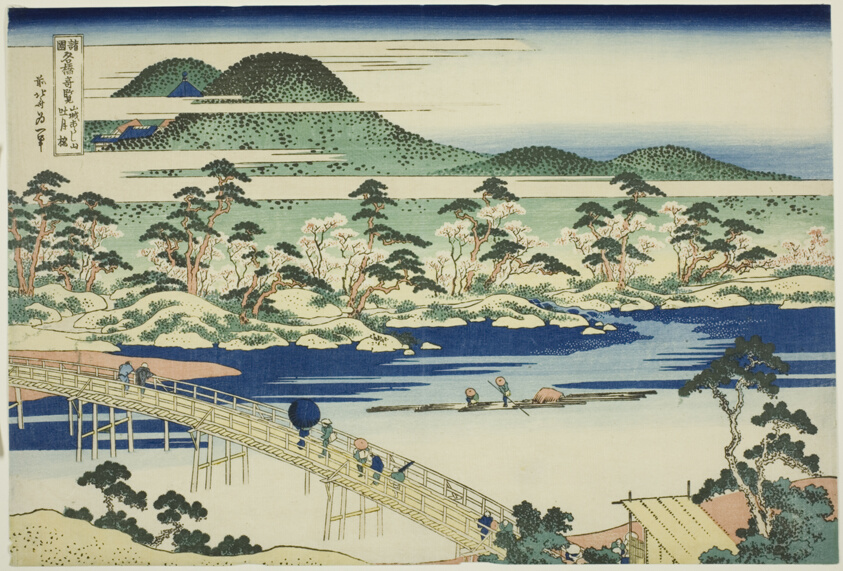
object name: Print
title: Togetsu Bridge at Arashiyama in Yamashiro Province (Yamashiro Arashiyama no Togetsukyo), from the series "Unusual Views of Famous Bridges in Various Provinces (Shokoku meikyo kiran)"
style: Japanese (culture or style)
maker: Katsushika Hokusai 葛飾 北斎; Japanese, 1760-1849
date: c. 1833/34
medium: Color woodblock print; oban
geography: Japan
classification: woodblock print; print; asian art